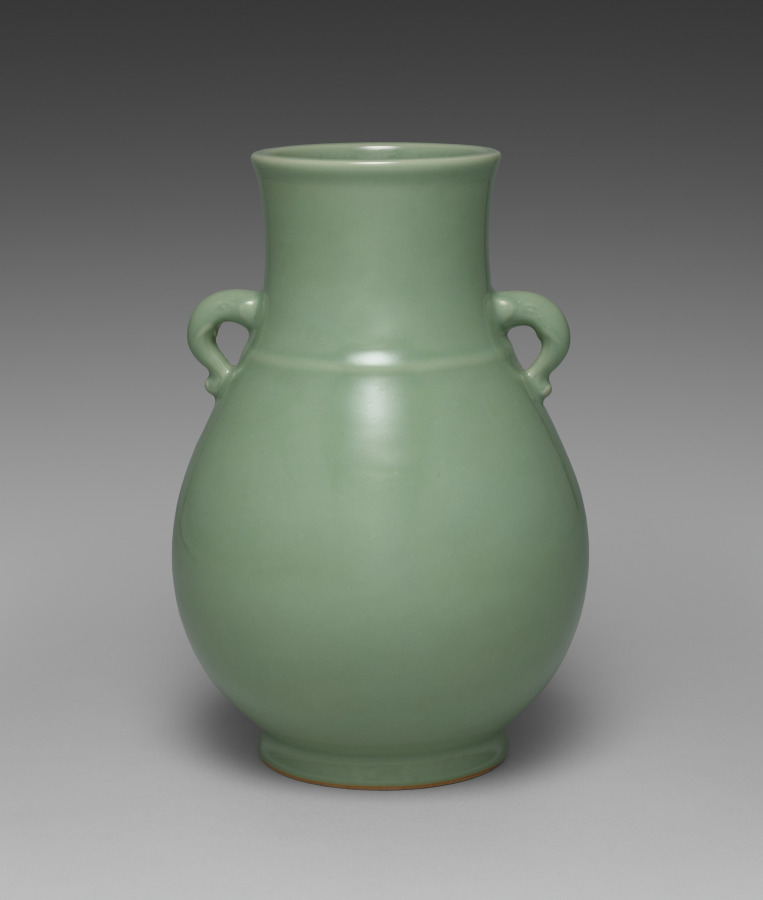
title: Hu-Shaped Vase with Handles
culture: Japan, Taishō period (1912–26) or Shōwa period (1926–89)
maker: Seifū Yohei IV (Japanese, 1872–1951)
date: 1914–46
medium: Porcelain with molded and carved design and green glaze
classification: Ceramic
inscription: 清風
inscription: 成山清風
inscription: 清風造【印】清風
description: Many of the vases created by Yohei III and IV were made with reference to and in emulation of Chinese ceramics in both form and glazing. The Seifu studio was inspired by later Chinese copies of two other archaic vessel types, the hu (Japanese ko) and guan (Japanese kan). In simple terms, in their original contexts, the hu and guan were storage jars that also appeared in ritual contexts. This hu-form vase by Yohei IV has a green glaze and handles in the shape of an elephant head. The details of the elephant heads are quite easy to miss, but a close look reveals that each has carved eyes with pupils defined, tiny ears and tusks in very low relief, and a curved trunk with the end curled up. This sort of container is even known as the “elephant ear” type. The only other decorative element on the vase’s pear-shaped body is a raised cordlike band around the shoulders.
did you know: The handles are shaped like elephant heads.